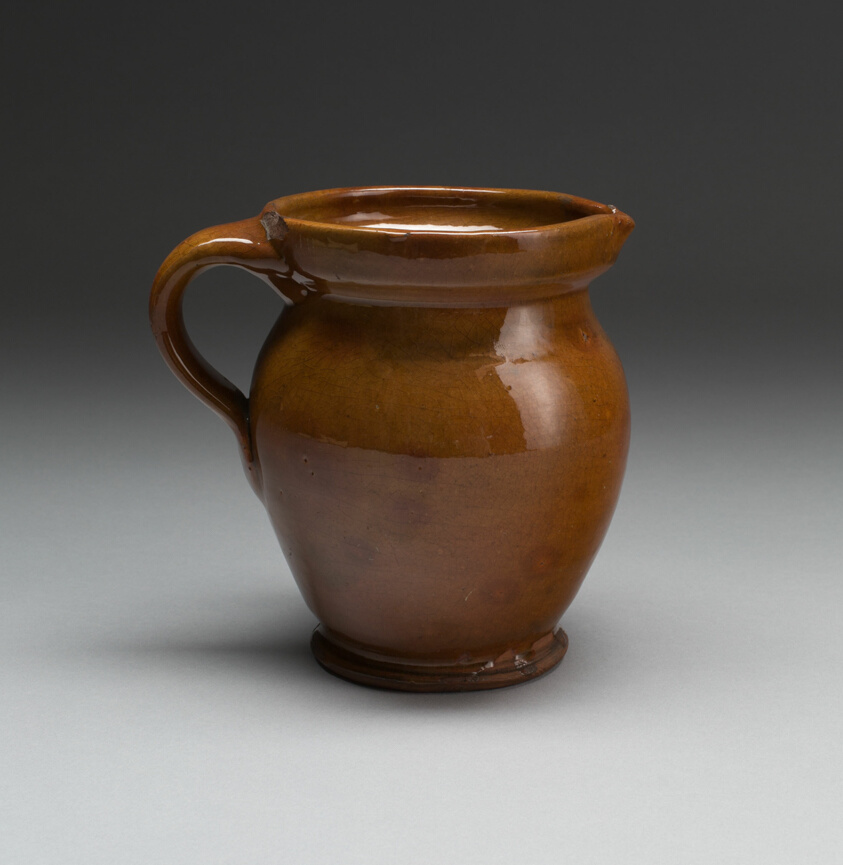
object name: Decorative Arts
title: Jug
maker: Artist unknown (American, 19th century); New England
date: 1800–30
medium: Earthenware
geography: New England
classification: vessel; american decorative arts; american arts; ceramics; decorative arts